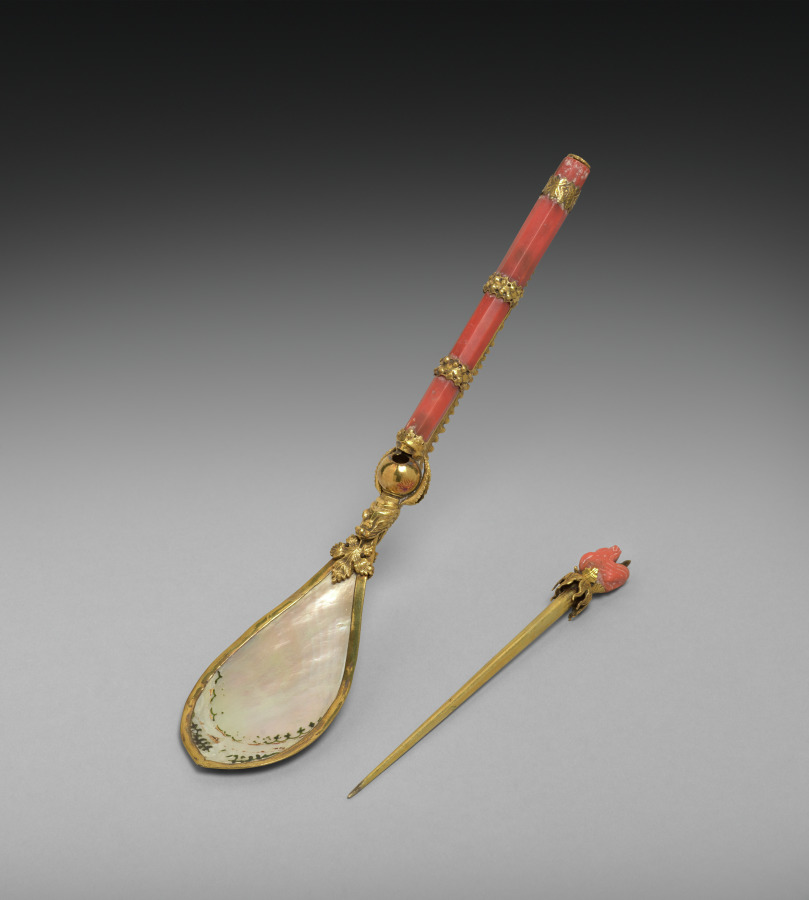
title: Spoon with Detachable Pick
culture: Italy, Venice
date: c. 1500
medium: enameled shell and coral, gilt-silver mounts; detachable pick with dragon's head finial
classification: Metalwork